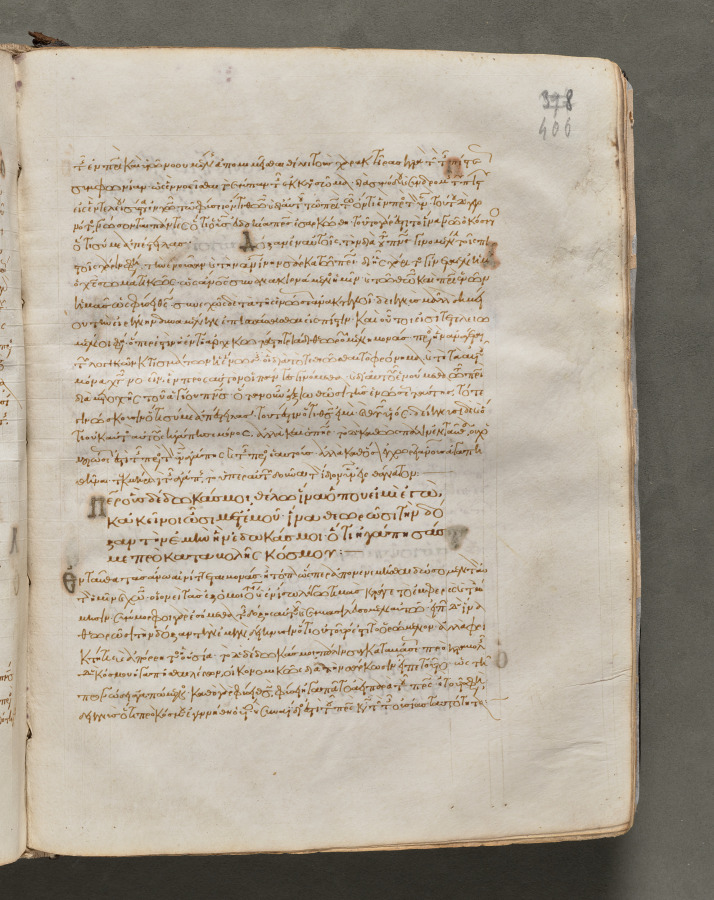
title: Text, folio 406 (recto), from a Gospel Book with Commentaries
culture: Byzantium, Constantinople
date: c. 1000–1100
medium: ink, tempera, and gold on vellum; leather binding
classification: Bound Volume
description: Each of the four gospels in this book opens on a page with brilliantly illuminated borders depicting the author of the text as well as birds—principally peacocks, symbols of the immortality of the soul—and fountains, representing the fountain of life and the salvation of the soul. This volume consists of 428 leaves with texts in Greek. Its level of sophistication suggests that it was probably written and decorated in a monastery in Constantinople.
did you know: Gospel books were carried in procession through Byzantine churches.